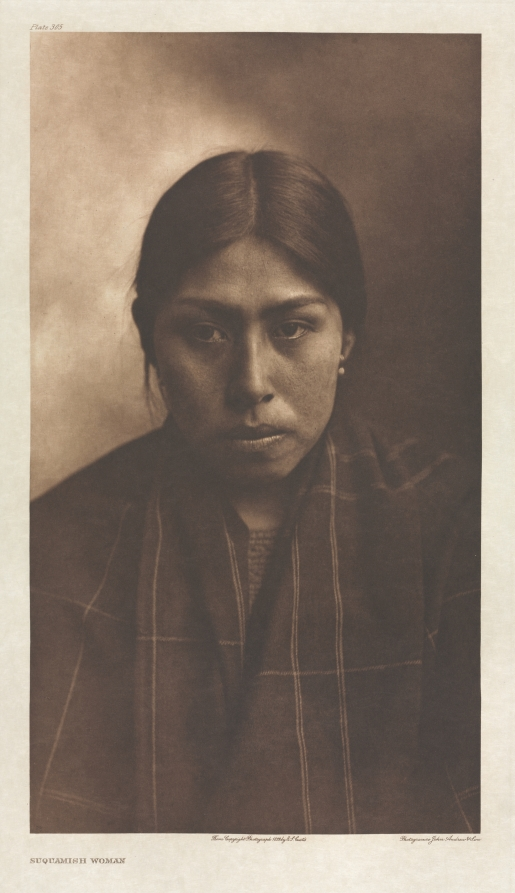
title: Portfolio IX, Plate 305: Suquamish Woman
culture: America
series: The North American Indian: being a series of Portfolios picturing and describing the Indians of the United States, the Dominion of Canada, and Alaska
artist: Edward S. Curtis (American, 1868–1952)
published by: The University Press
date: 1899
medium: photogravure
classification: Portfolio